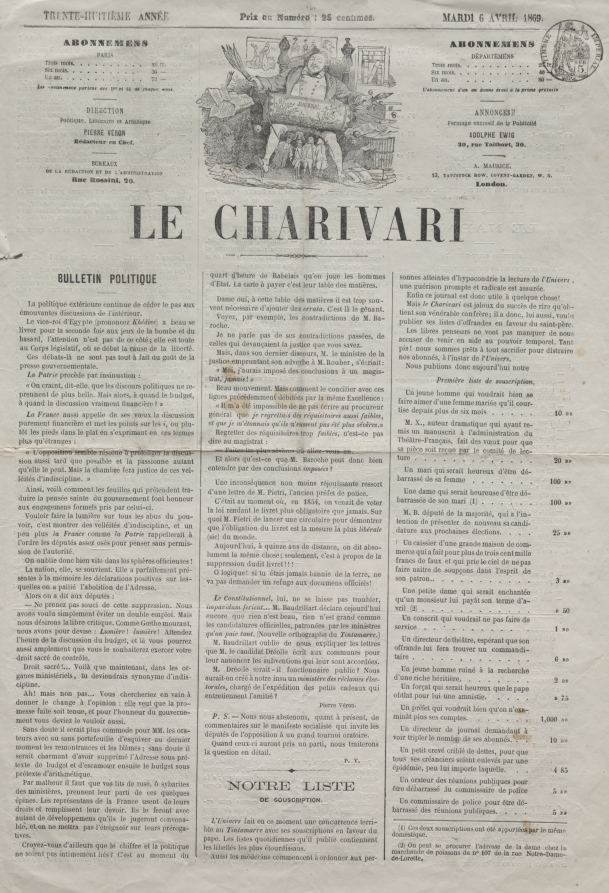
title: Difficult to make it look slim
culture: France, 19th century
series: News of the Day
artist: Honoré Daumier (French, 1808–1879)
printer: Destouches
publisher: Arnaud de Vresse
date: 1869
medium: lithograph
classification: Print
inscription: Upper margin, pencil: 12 ; Lower margin, pencil: Del. X. 3702, state III/III / Brilliant imp. ; Lower margin, printed: A de Vresse, r. de Rivoli, 55 / Lith. Destouches, r. Paradis Pre 28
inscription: Above image, printed: ACTUALITÉS. / 64 ; Below image, printed: Difficile à faire paraitre svelte..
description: This print was published in Le Charivari (April 6, 1869) as plate 64 from the series News of the Day.